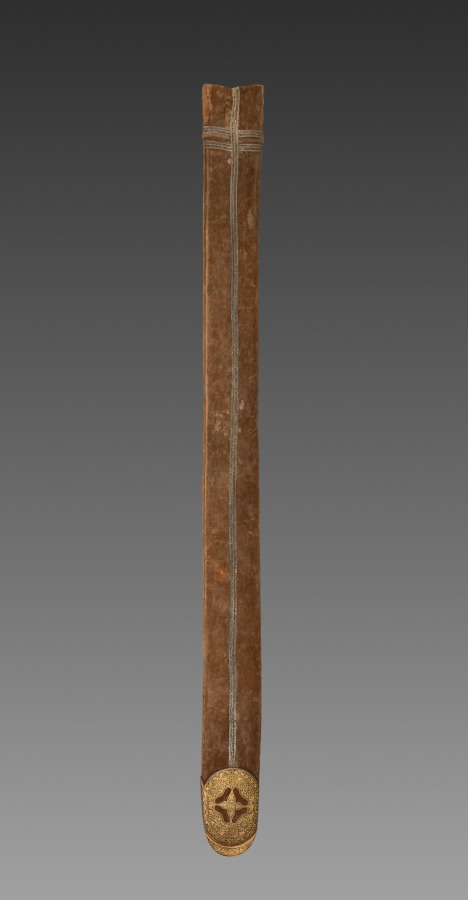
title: Scabbard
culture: India, perhaps Deccan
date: 1700s–1800s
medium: velvet lining with leather straps; wooden scabbard with velvet case and metallic threads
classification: Arms and Armor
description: Straight swords were typical of those used among military and aristocratic circles in the southern regions of the Deccan, in contrast to the curved swords favored by Central Asian equestrians. Increased contact between the Mughal north and the Deccan south during the 1600s led to the appearance of the Deccan-style sword in courtly portraits made during the time of Jahangir and Shah Jahan, and later.